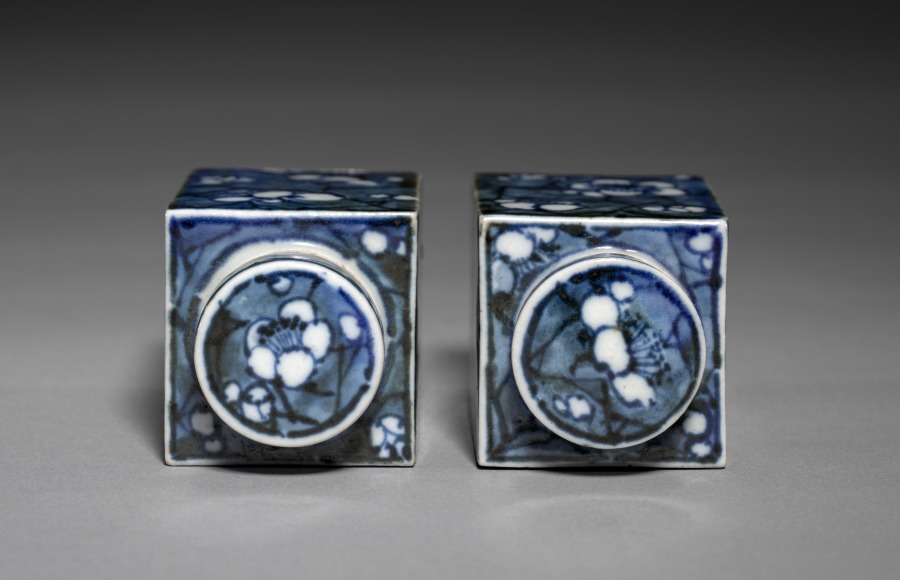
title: Pair of Tea Containers with Plum Blossoms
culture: Japan, Edo period (1615–1868)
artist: Aoki Mokubei (Japanese, 1767–1833)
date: early 1800s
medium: porcelain with underglaze blue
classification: Ceramic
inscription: signed "Ro Mokubei" on base in underglaze blue.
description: Aoki Mokubei, born into a family of restaurateurs, was a potter, calligrapher, painter, and scholar, and is considered one of the three masters of later Edo period Kyoto ceramics. He specialized in porcelains fashioned after Chinese prototypes, and created works for steeped tea (sencha) such as these matching tea caddies decorated in an underglaze blue called sometsuke—literally “with applied dye.” He signed them on their bottoms. They also have intricately patterned silk sleeves to both beautify and protect them. On the exterior of the lid of the outer wooden box that contains them, it is written that Mokubei inscribed and painted an image on the box. On the interior of the lid, the signature and seals of a former owner are written. Mokubei has signed the lid of the inner box, and a charming ink and light color composition of West Lake in Hangzhou in China covers its three sides. On the fourth side is a long inscription by Mokubei describing the scene.